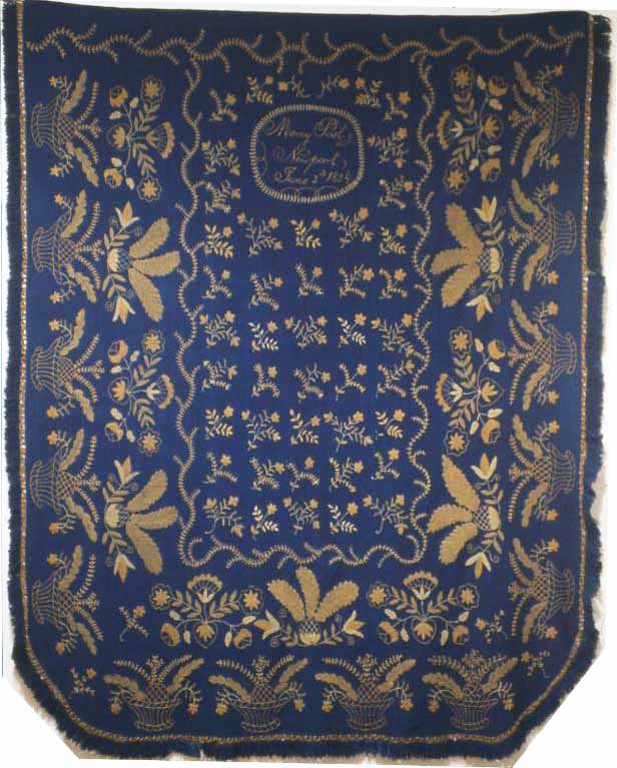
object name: Textile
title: Bedcover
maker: Mercy Post (American, active c. 1824); Newport, Herkimer County, New York, United States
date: 1824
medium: Wool, twill weave; embroidered with wool in detached chain, Roumanian, satin, surface satin and stem stitches; edged with buttonhole-stitched loops and woven cut fringe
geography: New York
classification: textile; needlework (visual works); needlework - quilt